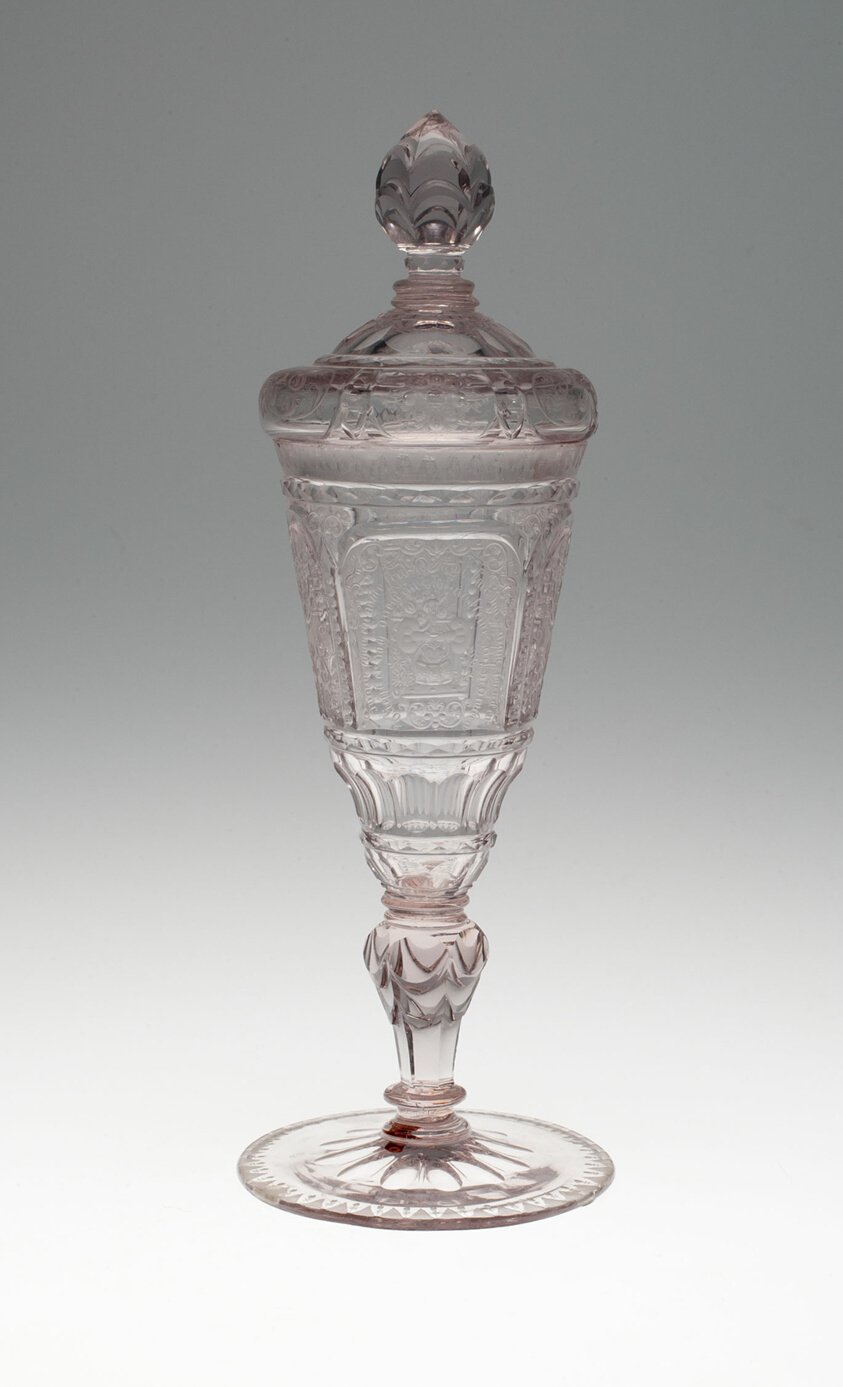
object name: Glass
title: Goblet with Cover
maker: Schleswig, Germany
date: c. 1730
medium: Glass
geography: Schleswig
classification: drinking vessel; glass; european decorative arts